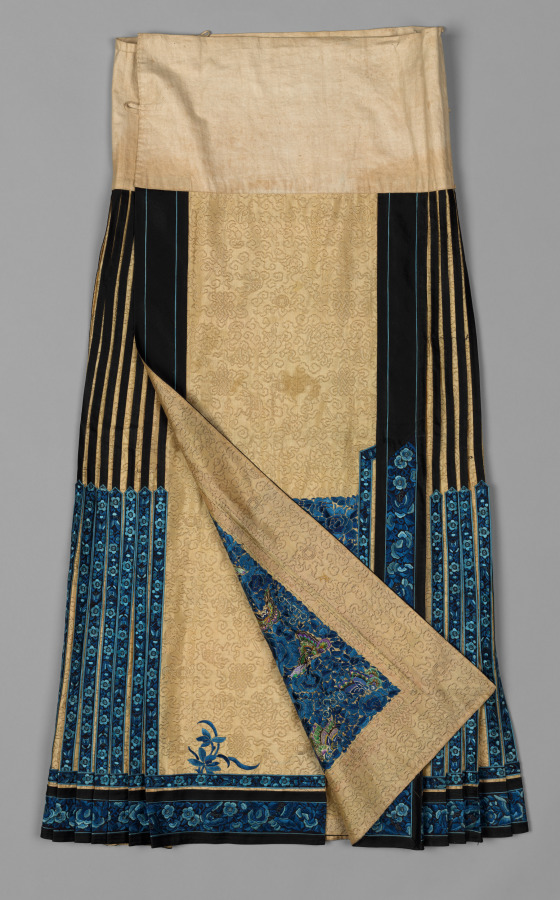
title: Skirt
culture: China, Qing dynasty (1644–1911)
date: late 1870s–early 1880s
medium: Silk, embroidery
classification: Garment